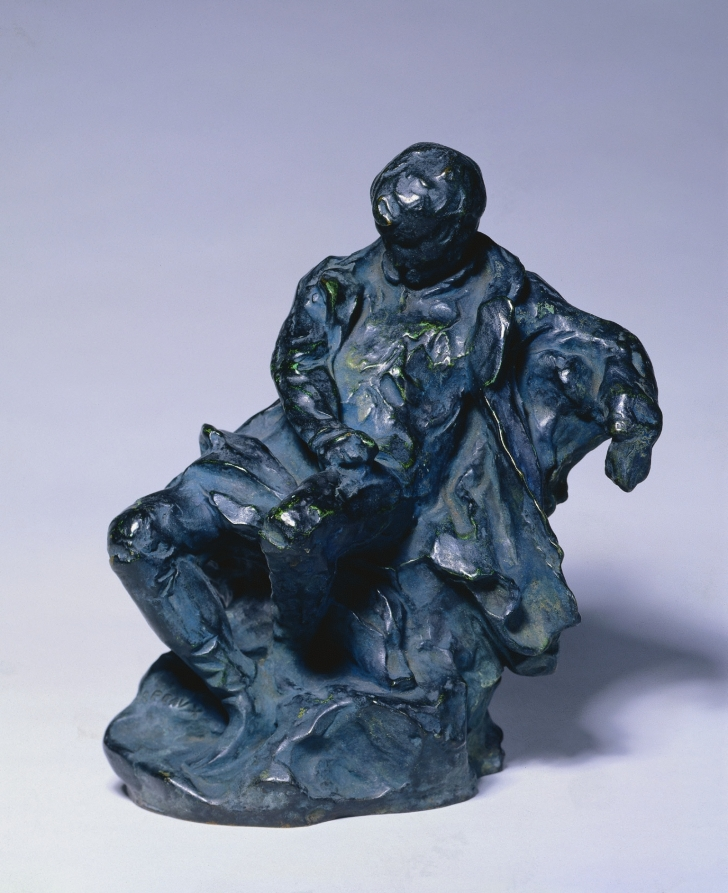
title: Napoleon on St. Helena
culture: France, 19th century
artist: Jean-Baptiste Carpeaux (French, 1827–1875)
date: c. 1860–1870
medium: bronze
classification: Sculpture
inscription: Carpeaux, probably in the wax model, left of Napoleon's foot; on back, an inscription, perhaps the foundry name, has been obliterated with tool marks.